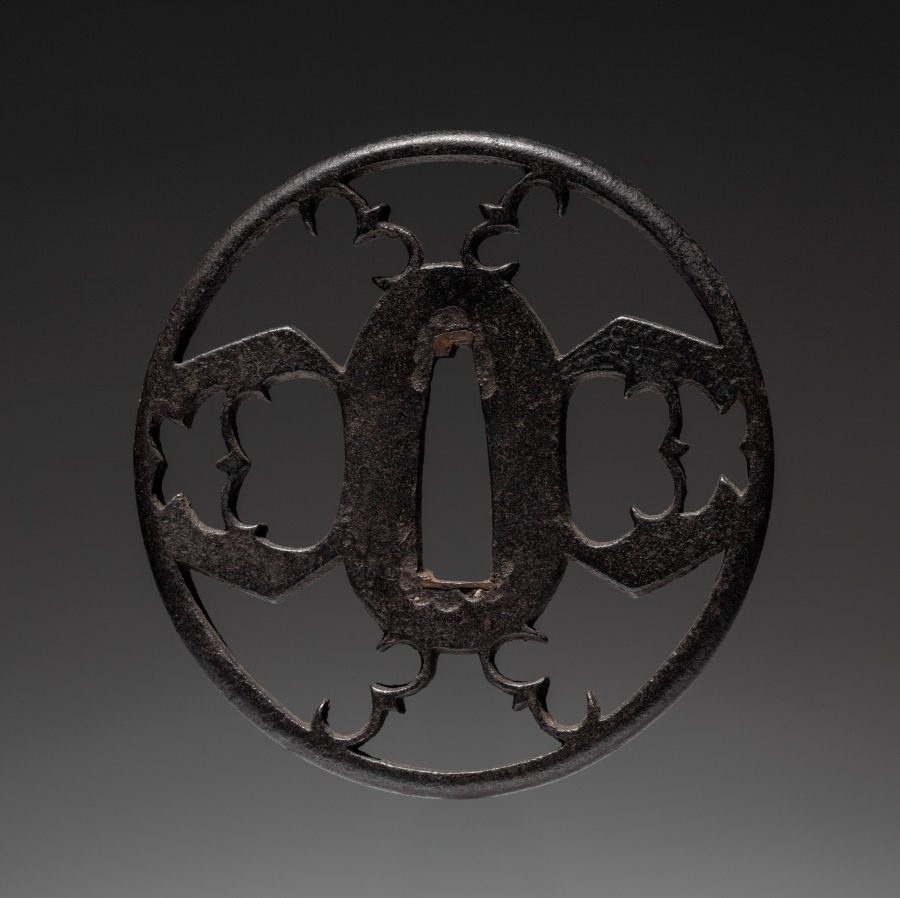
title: Sword Guard (Tsuba)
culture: Japan, possibly Edo period (1615-1868)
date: c. 1615–1868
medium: iron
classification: Arms and Armor